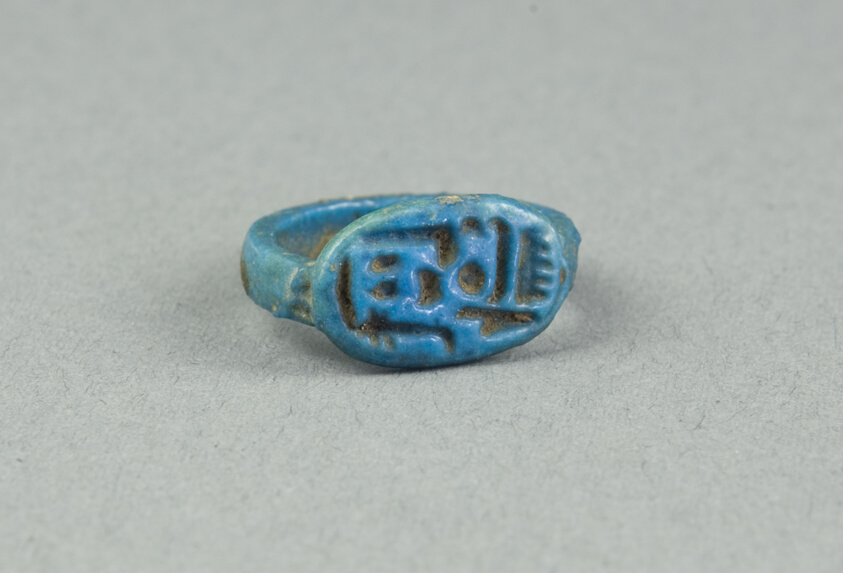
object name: Costume and Accessories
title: Ring: Amun-Ra, King of the Gods, the Lord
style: egyptian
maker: Egyptian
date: New Kingdom, Dynasties 18–20 (about 1550–1069 BCE)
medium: Faience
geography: Egypt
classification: ring (jewelry); ceramics; jewelry; ancient art; costume; faïence (composite material)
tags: gods (deities)